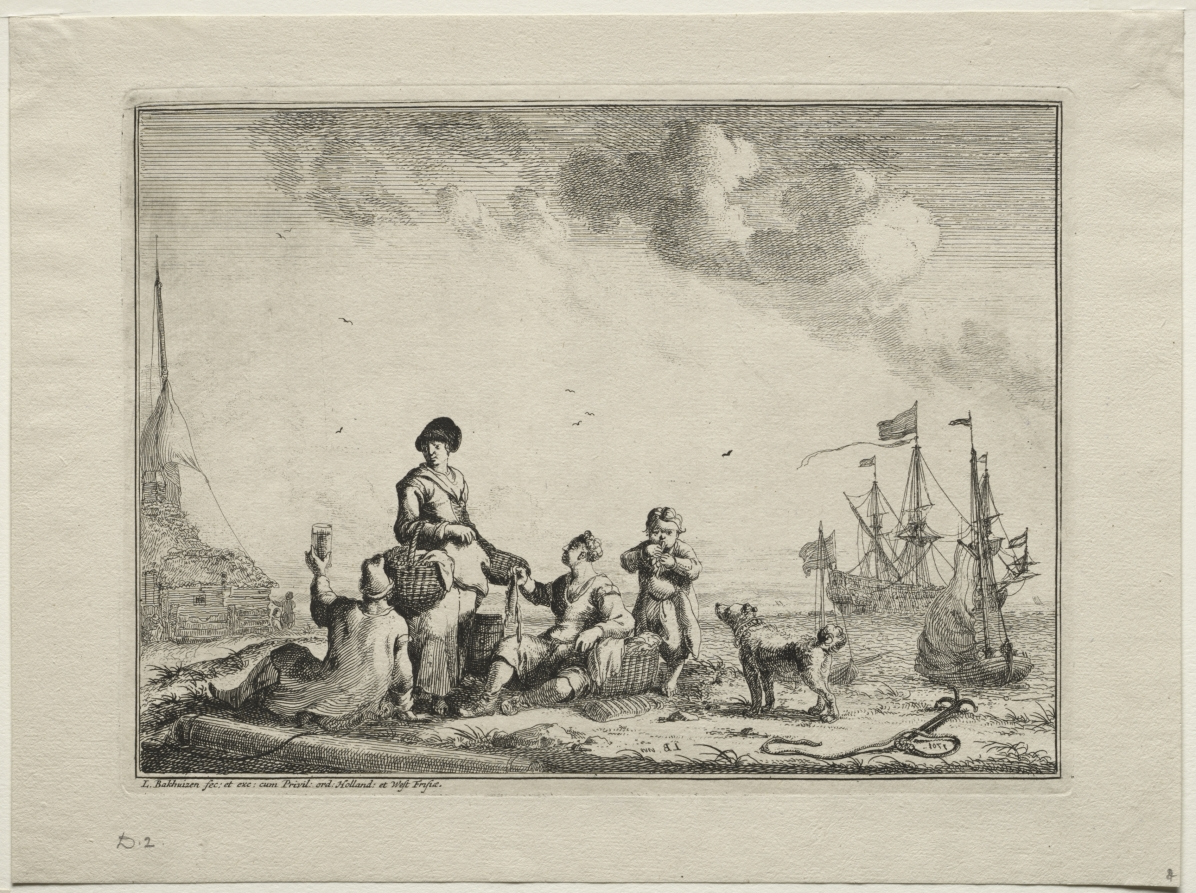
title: Fish Vender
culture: Netherlands, early 18th century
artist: Ludolf Backhuysen (Dutch, 1631–1708)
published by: Ludolf Backhuysen (Dutch, 1631–1708)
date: 1701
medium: etching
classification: Portfolio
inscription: lower left, in plate: L. Bakhuizen fec: et exc: cum Privil: ord: Holland: et West Frisiæ; lower center, in plate: LB[in reverse] ; lower right, in plate: 1701[in reverse] ; lower left, in graphite: D.2. ; lower right, in graphite: [4?]